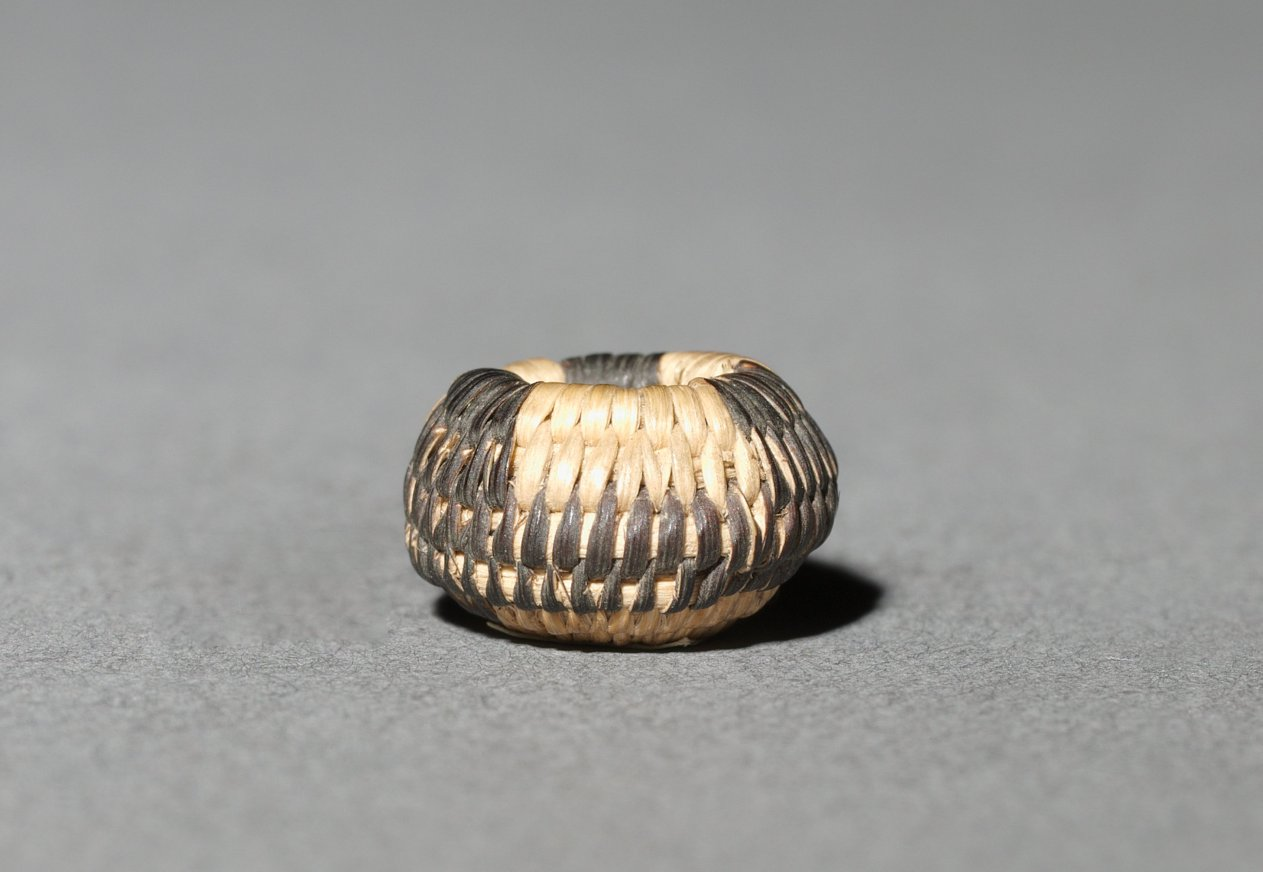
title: Miniature Basket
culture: America, Native North American, Southwest, Arizona, Akimel O'odham (Pima), Unassigned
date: before 1923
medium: plant fiber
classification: Basketry